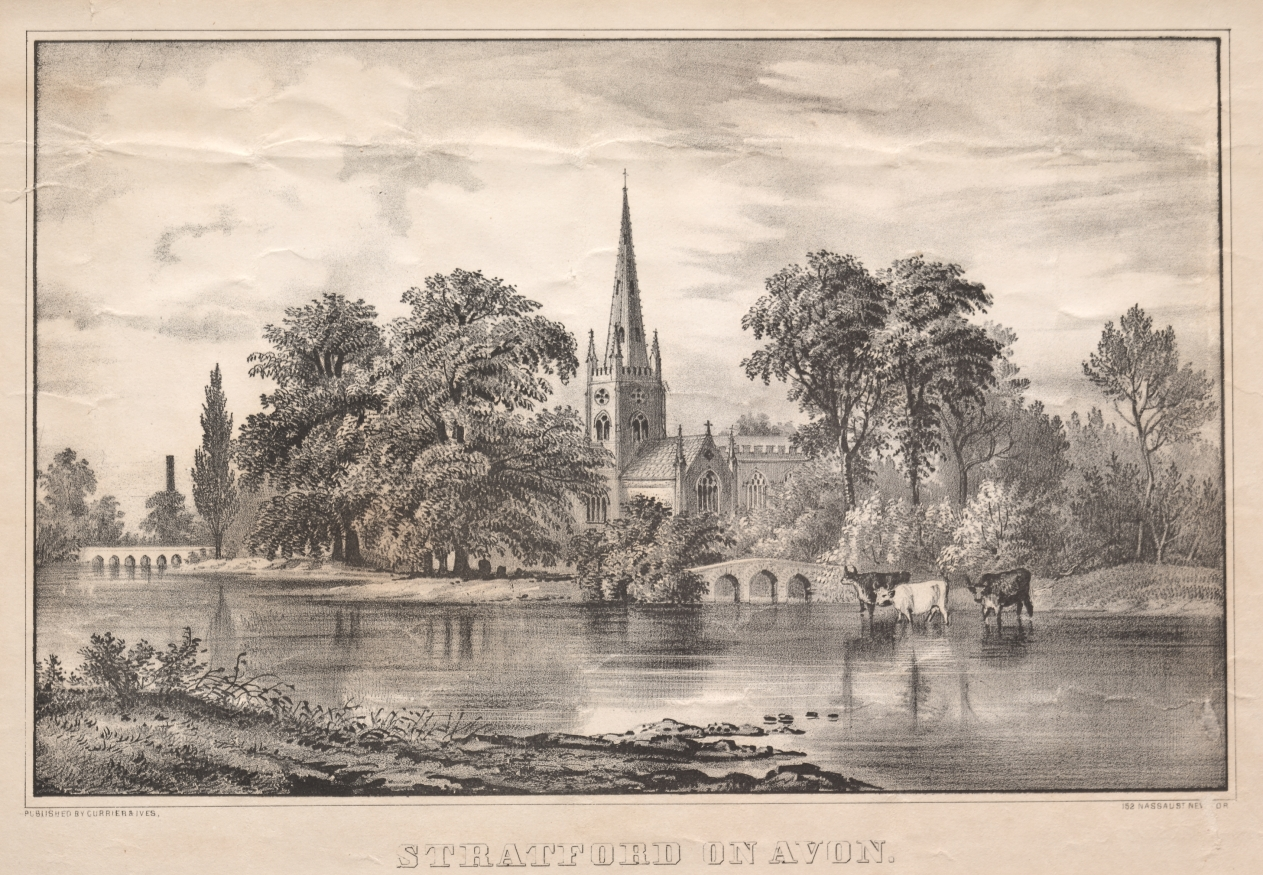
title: Stratford on Avon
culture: America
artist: and James Merritt Ives (American, 1824–1895)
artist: Nathaniel Currier (American, 1813–1888)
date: 1856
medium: lithograph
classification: Print